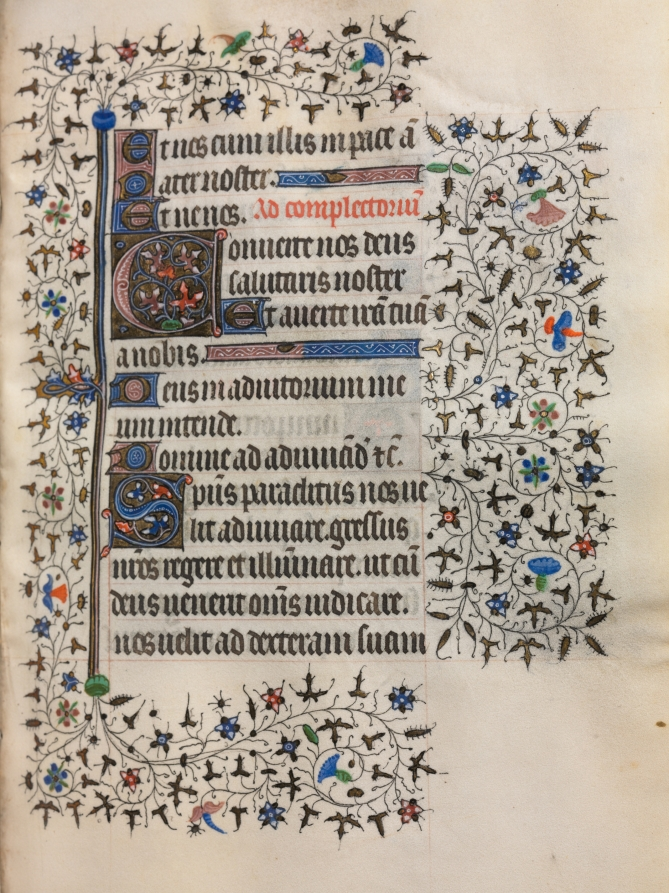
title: Book of Hours (Use of Paris): Decorated Initial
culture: France, Paris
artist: follower of Boucicaut Master (French, Paris, active about 1410–25)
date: c. 1420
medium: ink, tempera, and gold on vellum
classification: Bound Volume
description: The Guise Master-named after the book of hours he illustrated for François de Lorraine, Duke of Guise-developed his style from the more dominant Parisian workshop of the Boucicaut Master.